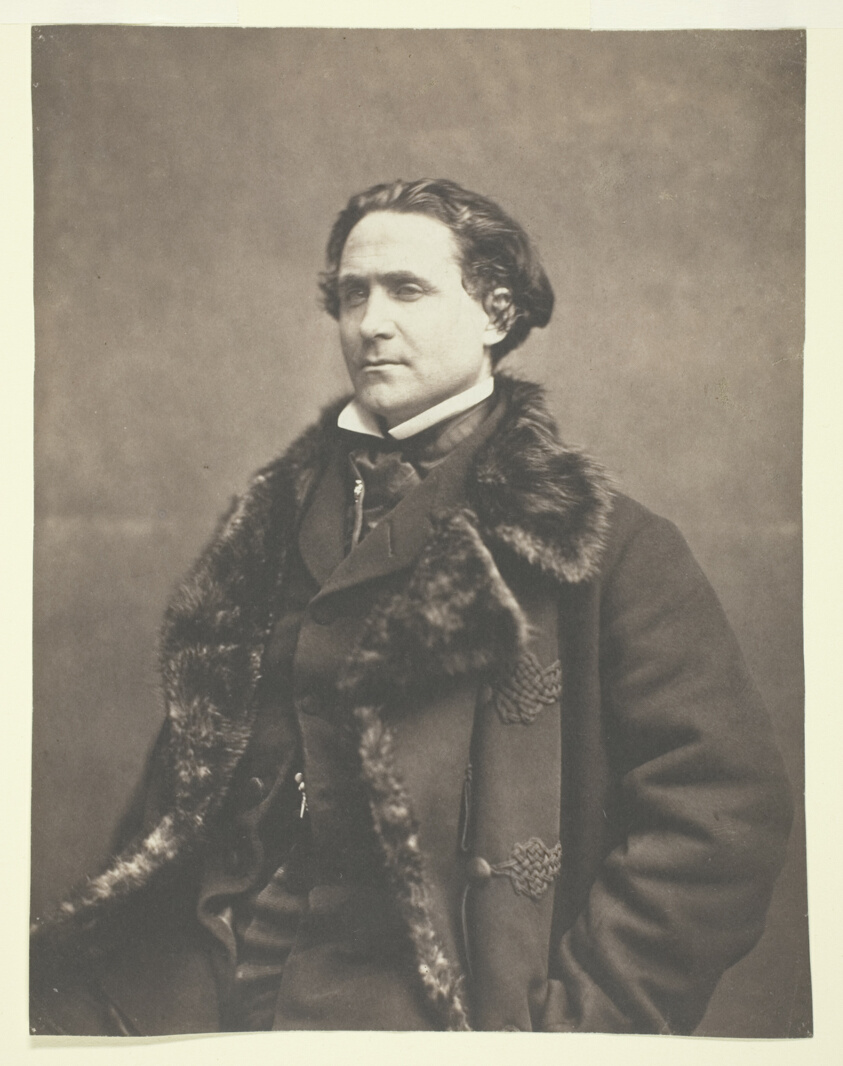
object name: Photograph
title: Portrait of La Fontaine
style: 19th century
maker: Nadar (Gaspard Félix Tournachon) (French, 1820–1910)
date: c. 1854–1860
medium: Salted paper print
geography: France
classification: salted paper print; photographic process; photography; photograph